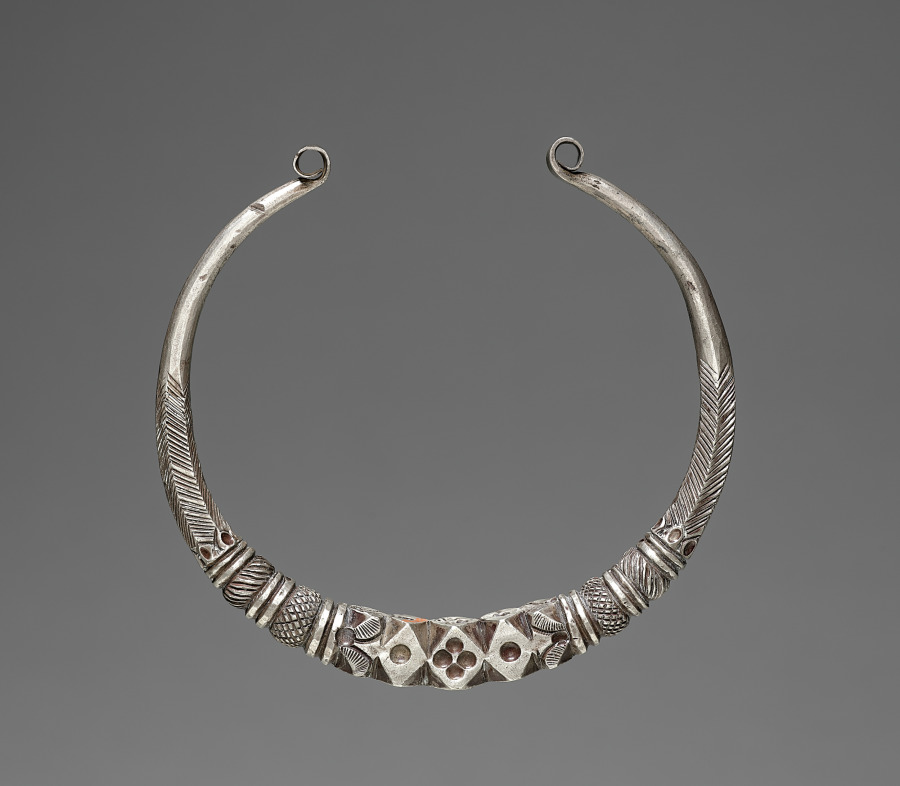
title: Neckpiece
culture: India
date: 1800s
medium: silver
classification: Jewelry